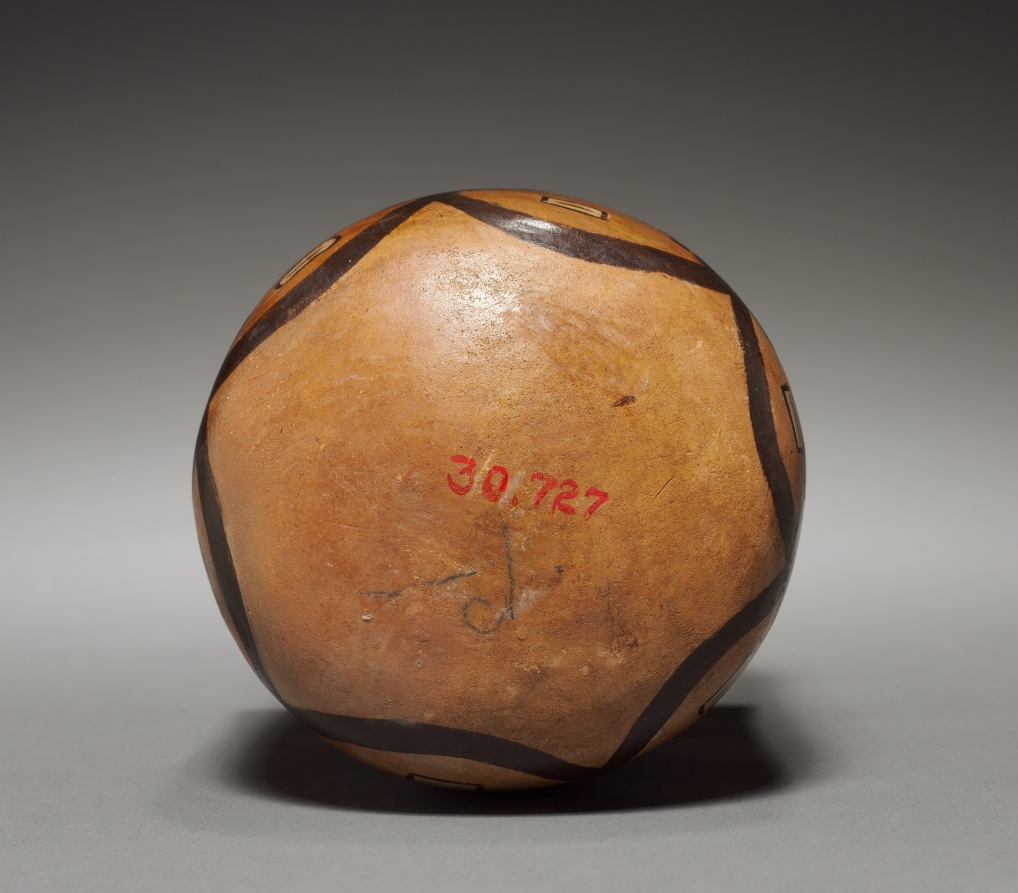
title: Vessel with Female Faces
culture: Peru, South Coast, Nasca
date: 100 BCE–700 CE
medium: earthenware with colored slips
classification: Ceramic